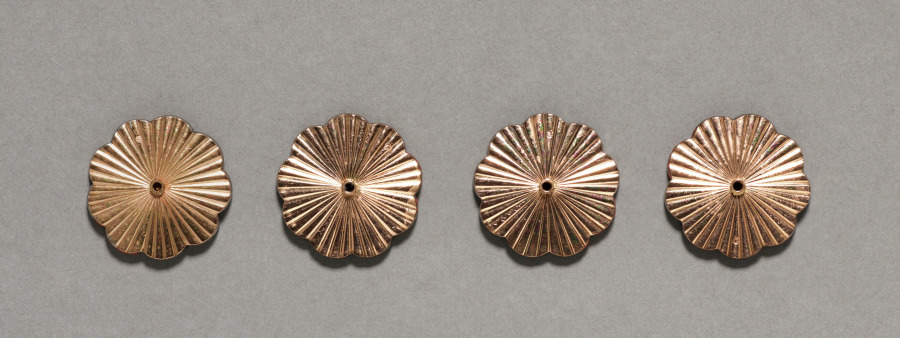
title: Buttons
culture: Russia, St. Petersburg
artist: firm of Peter Carl Fabergé (Russian, 1846–1920)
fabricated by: August Wilhelm Holmström (Russian, 1929–1903)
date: after 1896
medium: gold, enamel, diamonds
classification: Miscellaneous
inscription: inscribed: double-headed eagle; Fabergé; St. Petersburg, Moscow (all in Cyrillic; inside lid of box).